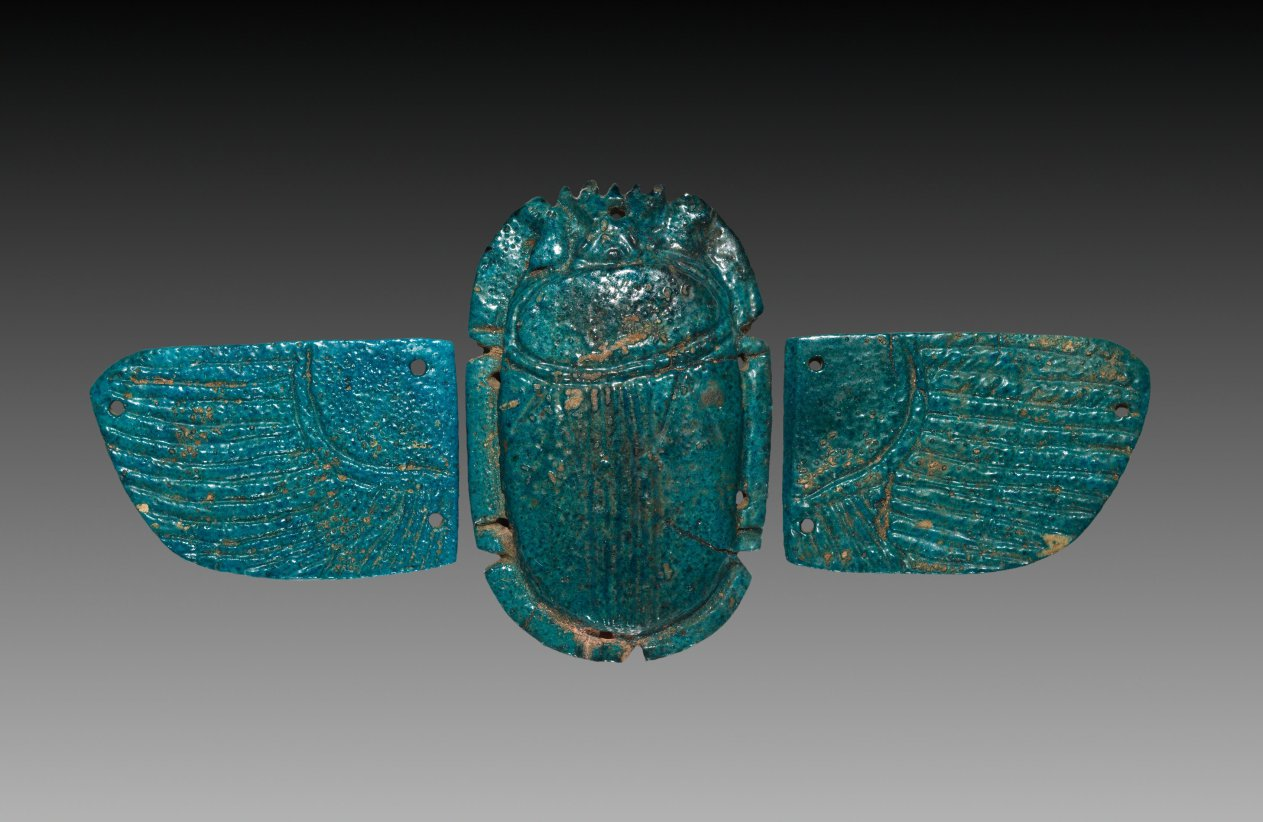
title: Winged Pectoral Scarab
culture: Egypt, Late period (715–332 BCE), Dynasty 26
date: 664–525 BCE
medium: deep turquoise faience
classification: Scarabs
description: To create connections between their work and ancient Egypt, European and American jewelers conducted careful research, looking at sources including hieroglyphs in funerary art and architecture. The1924 Cartier scarab brooch was directly inspired by representations of the dung beetle, which also stood for Khepri, a sun deity of resurrection, while the 1927 gateway brooch echoes the silhouette of ancient Egyptian temple entrances. Beauty companies like Bourjois even adopted ancient Egyptian motifs for their marketing and packaging, suggesting the elegance of their brand through sensationalized elements of ancient Egyptian art.